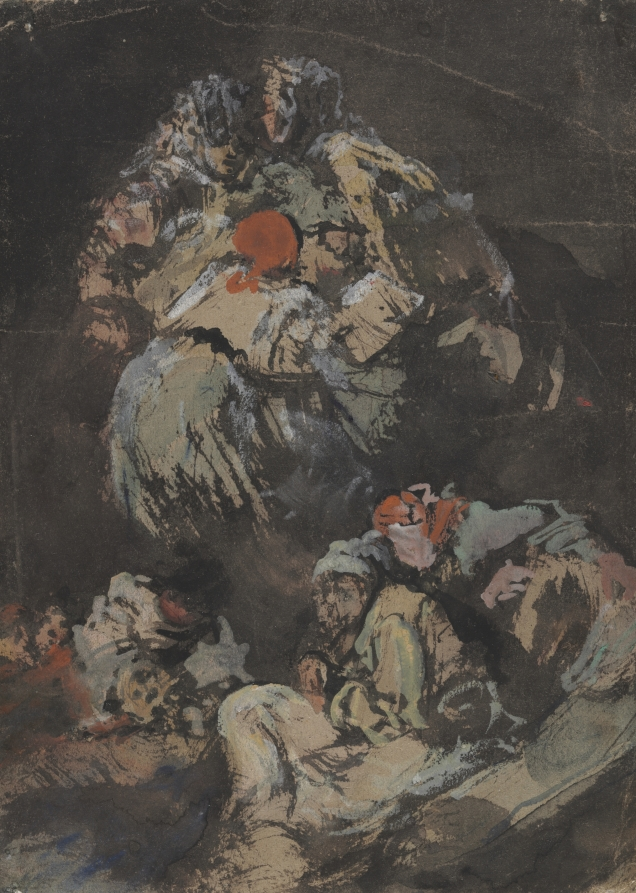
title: Figures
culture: Spain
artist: Eugenio Lucas Velázquez (Spanish, 1817–1870)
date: 1850–60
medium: watercolor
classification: Drawing